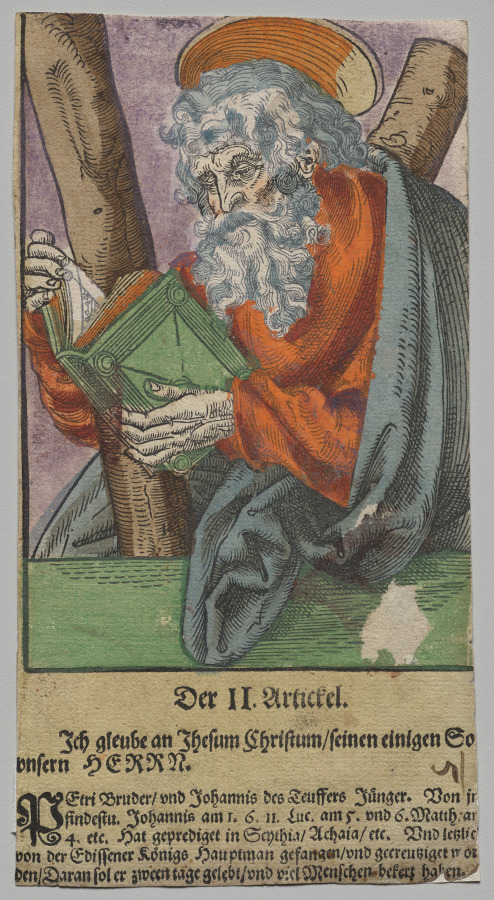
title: Andrew from Christ, the Apostles, and Saint Paul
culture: Germany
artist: Lucas Cranach the Elder, After (German, 1472–1553)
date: 1563/64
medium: Woodcut with letterpress text, hand colored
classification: Print